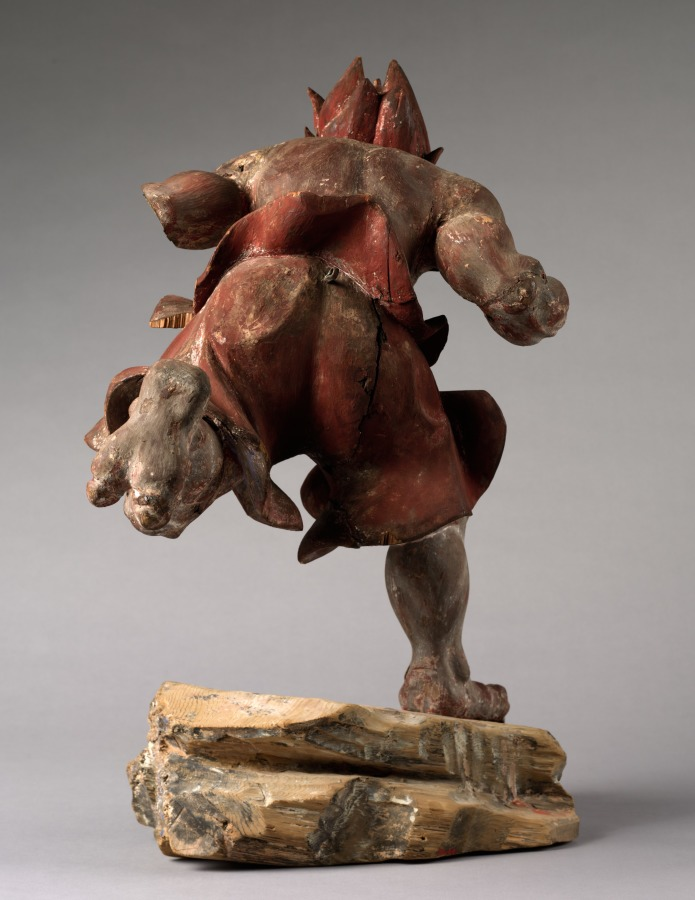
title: Thunder God (Raijin)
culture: Japan, Kamakura period (1185–1333)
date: 1300s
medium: wood with traces of gesso and red and black pigment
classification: Sculpture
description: The Thunder (Raijin) and Wind (Fujin) gods first appeared in early Buddhist art in China and Japan and were based on the popular imagery in India that was derived from the life of the historical Buddha, Shakyamuni. They were shown among a group of demon-monsters flying through the sky above the meditating Shakyamuni in an attempt to frighten away his concentration. Raijin is surrounded by a ring of small drums struck by a stick held in his hand so that he is always accompanied by a thunderous noise. A metal clasp protruding from this sculptures' back indicates that a ring of drums was once attached to the Cleveland Raijin. The matching sculpture, Fujin, is in the Fukuoka Art Museum in Japan.